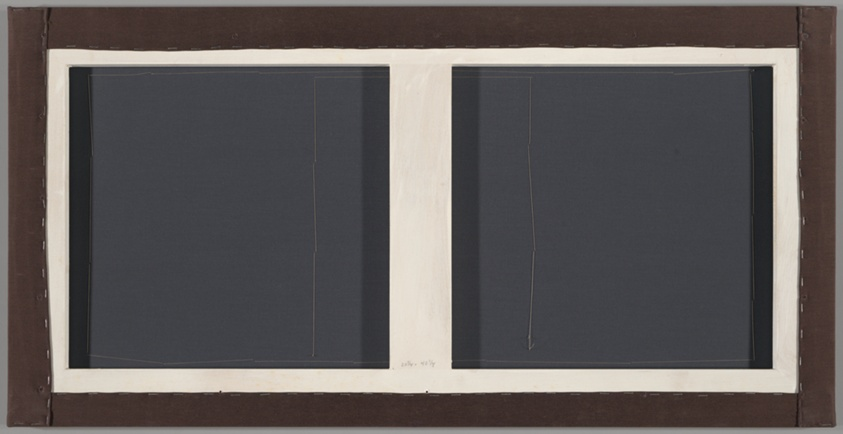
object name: Coverings and Hangings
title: Susanna and the Elders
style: 17th Century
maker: English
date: early 17th century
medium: Silk, wool, and linen, slit, and single interlocking tapestry weave, with eccentric wefts; and metal strip-wrapped-silk outlining wefts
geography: England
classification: weaving - tapestry; tapestry; textile; weaving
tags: Christian subjects, bathing, botanical/floral, columns, fruit, people, trees